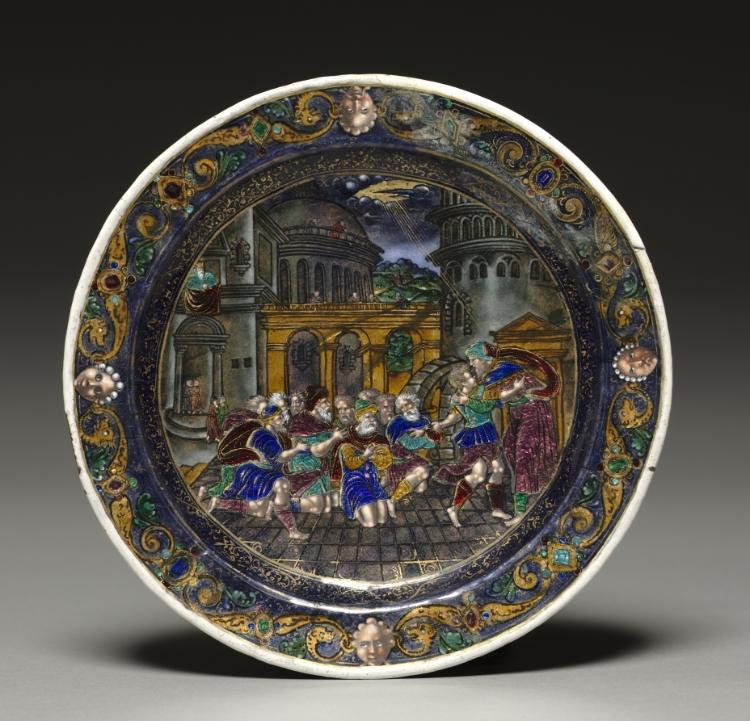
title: Plate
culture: France, Limoges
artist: Jean II de Court (French, before 1583)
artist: or Jean Courtois (French)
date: mid- to late 1500s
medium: painted enamel on copper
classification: Enamel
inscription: initialled: I. C. [identified with Jean II de Court or Jean Courtois]